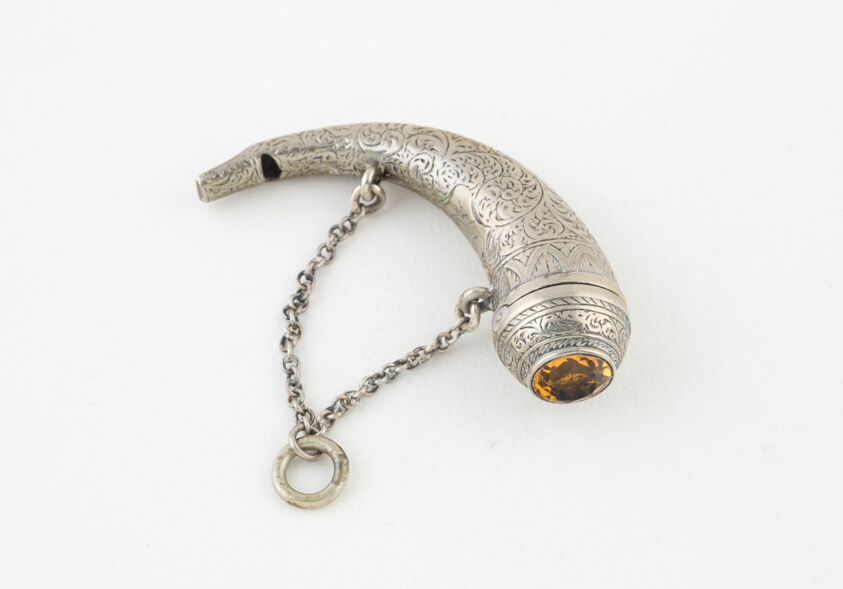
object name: Metalwork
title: Vinaigrette with Whistle in the Form of a Hunting Horn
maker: Possibly Scotland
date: c. 1840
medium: Silver, silver gilt, cairngorm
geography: Scotland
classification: vinaigrette (container for health care); container for personal use; box; european decorative arts; metalwork; silver; decorative object/ornament